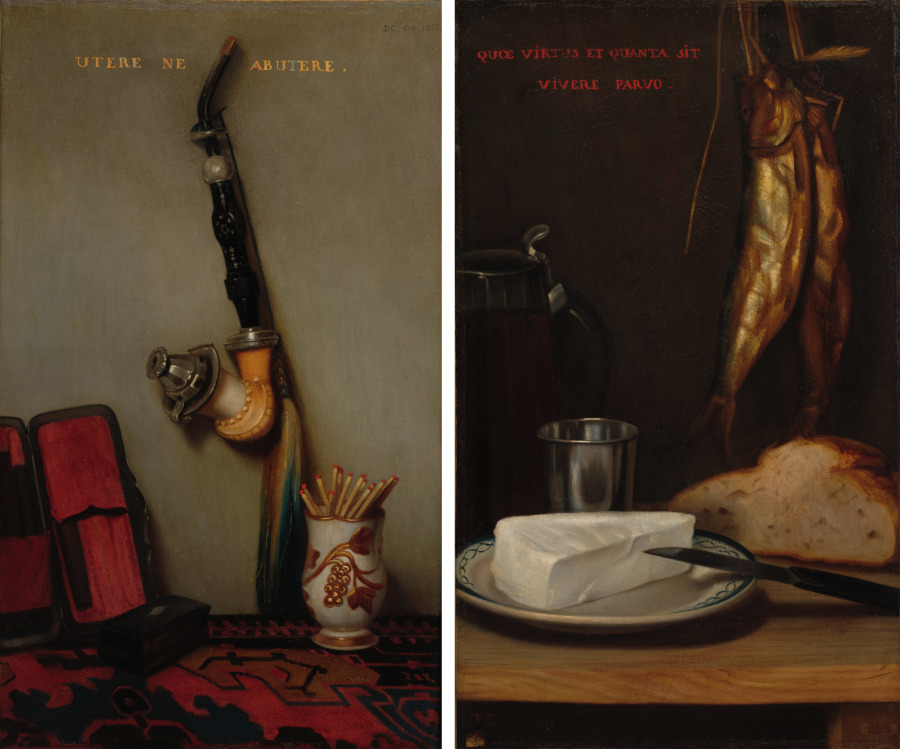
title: Still Life with Pipe and Matches and Still Life with Herring, Bread, and Cheese (pair)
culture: France, 19th century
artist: Alexandre-Gabriel Decamps (French, 1803–1860)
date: 1858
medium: oil on fabric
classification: Painting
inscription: Signed lower left: dc; upper right: dc rev 1858; inscribed above: utere ne abutere [Use, not abuse]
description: The artist was a smoker. In this composition the place of honor is given to a pipe made in Austria around the middle of the 19th century. It is made of precious materials—meerschaum, silver, amber, horn or lacquered wood—that are carefully fashioned, all lovingly rendered by the artist. The cord with a tassel (perhaps of horsehair) is not just a decorative element, it is a security measure in case the precious bowl of the pipe becomes detached from the pipe stem. The pipe is surrounded by ordinary smoker's accessories—a cigar case, a snuffbox, and a match holder in porcelain—all placed on a Turkish rug. The Latin inscription translates: "Use, not abuse." In 1858 Decamps was 55 years old and not in the best of health. Perhaps a doctor had advised him to reduce his consumption of tobacco.